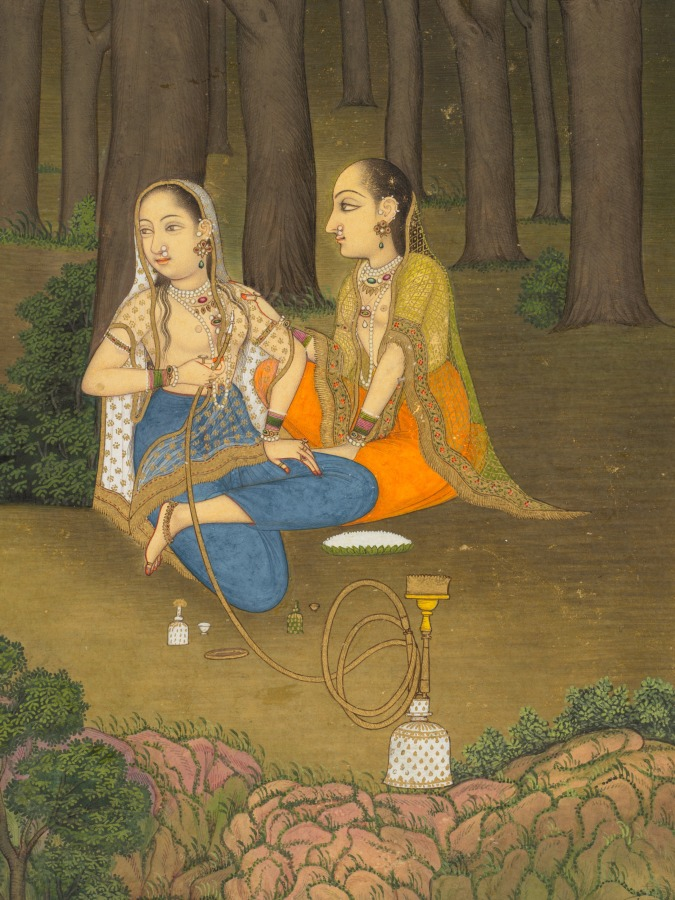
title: Women Enjoying the River at the Forest’s Edge (recto)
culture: India, Murshidabad or Lucknow, Mughal, 18th century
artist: style of Hunhar II (Indian, active mid-1700s)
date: c. 1765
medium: Gum tempera and gold on paper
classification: Painting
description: The image of young women at play, in association with water and the fruiting of trees, such as this mango, has been used in Indian art to signal the idea of prosperity and abundance. Rain clouds approach that will nourish the land. The pairs of women on the banks sample perfumes, and in front of them bowls made of leaves appear to hold jasmine flowers for adorning the hair. One woman smokes a hookah and looks on as two companions frolic in the rivulet. The palace’s white marble buildings are barely indicated in the far distance.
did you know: Mangoes are in varying stages of ripeness, from green to bright orange-yellow.